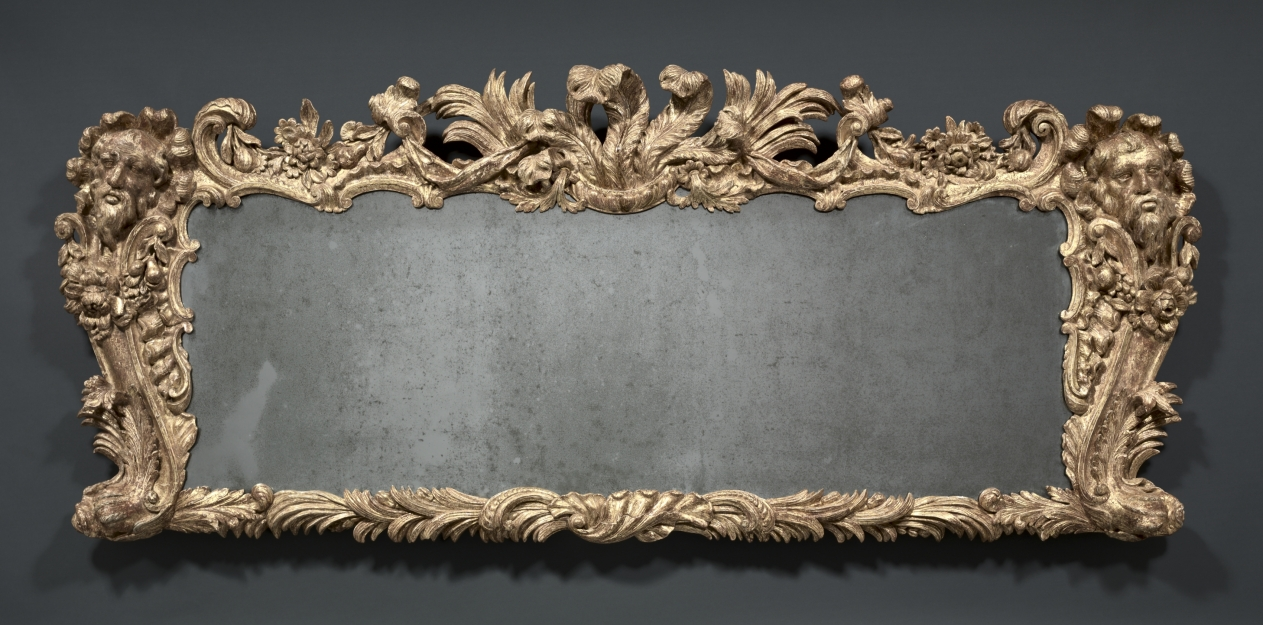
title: Overmantel Mirror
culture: England, 18th century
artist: James Pascall (British, c. 1697–1746)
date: c. 1740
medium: carved giltwood and glass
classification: Furniture and woodwork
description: The carved ostrich feathers along the top of this mirror are a likely reference to the emblem of Frederick, Prince of Wales (1707–1751), the eldest son of George II (reigned 1727–1760), who pitted himself against his father and even set up a rival court of advisors in London. He saw himself as much more sophisticated and worldly, and in the world of design, harbored a love of all things French and modern, whereas George II was staunchly conservative and favored earlier historicist styles. The subtle carved plumes carved into this mirror suggest the political leanings of the owner who must have favored the prince over the king, a bold statement that would have been evident to anyone at the time. As it turns out, the rivalry dissipated when Frederick died prematurely at the age of 44, leaving his own eldest son to succeed his grandfather as George III in 1760.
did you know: In contrast to mirrors today, plate glass mirrors produced in Britain during the 1700s such as this one were backed with mercury and thin sheets of tin which give them their dark appearance.